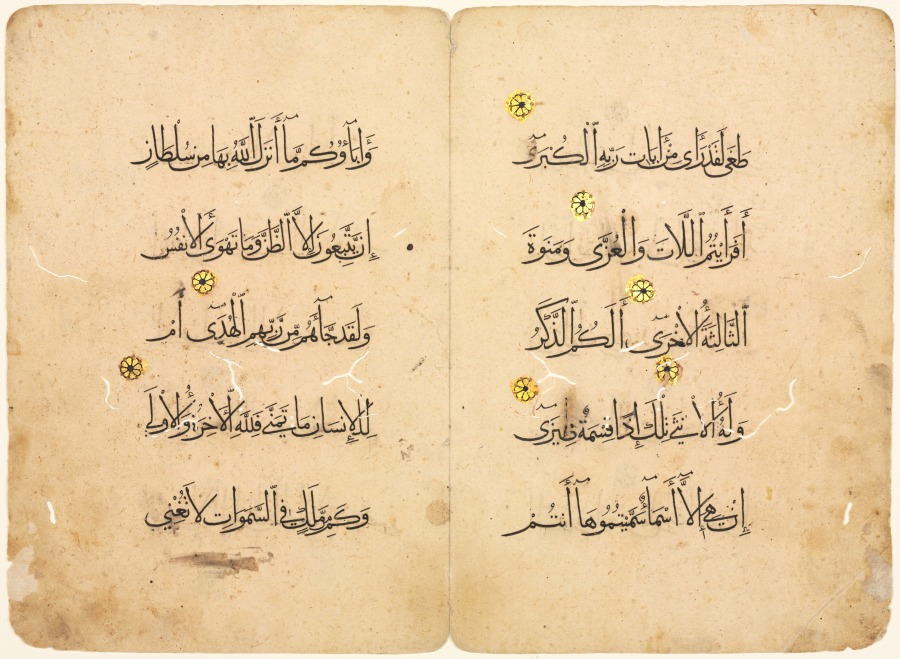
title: Qur'an Manuscript Folio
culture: Egypt, Mamluk sultanate (1250–1517)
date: 1300s–1400s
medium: ink, gold, and colors on paper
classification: Drawing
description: It is through the Arabic language that the Qur’an was revealed to the Prophet Muhammad in the 600s. As a result, calligraphy is celebrated as the highest form in Islamic art. The verses (ayat) written here come from the 53rd chapter (surah) of the Qur’an, also known as the Surah An-Najm, the Chapter of the Star. The significance of the Qur’an provides an explanation for the importance of calligraphy, but its use was not restricted to religious texts. Many objects in the museum's Islamic collection bear calligraphic inscriptions and come from secular contexts, displaying the versatility and creativity of this art form.